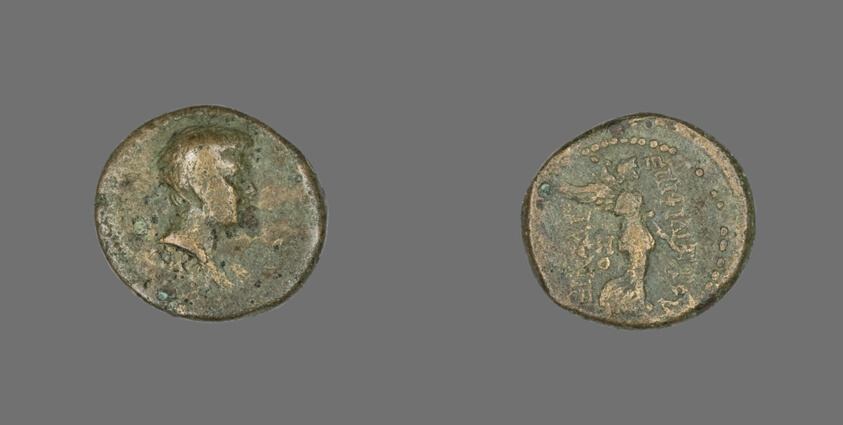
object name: Coin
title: Coin Depicting a Male Bust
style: roman (ancient, style or period), ancient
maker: Roman; minted in Smyrna, Ionia (now Izmir, Turkey)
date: 55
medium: Bronze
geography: Rome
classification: coin; ancient art